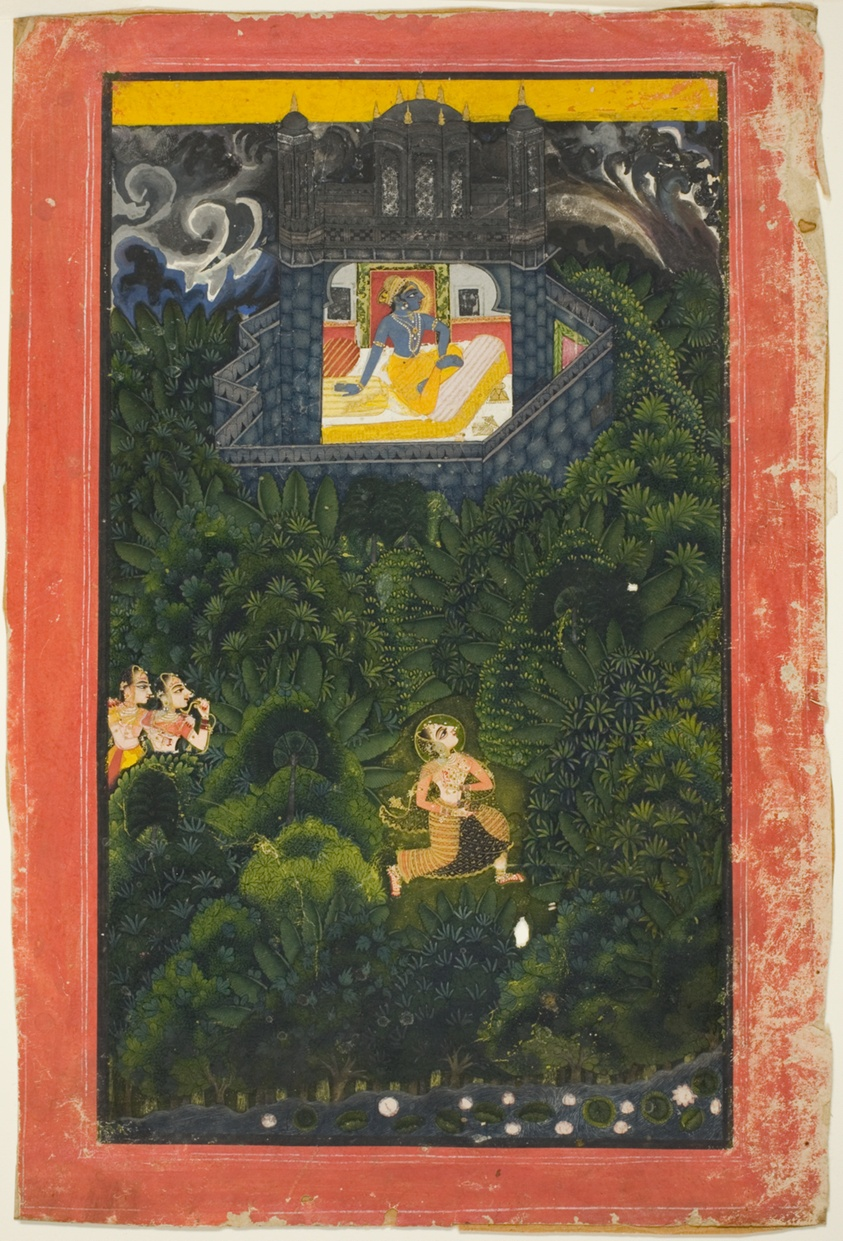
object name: Painting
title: Abhisarika Nayika (Heroine Running to Meet her Lover)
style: South Asian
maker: India; Rajasthan, Kota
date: Mid–18th century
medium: Opaque watercolor and gold on wove paper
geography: Kota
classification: gouache; painting; asian art